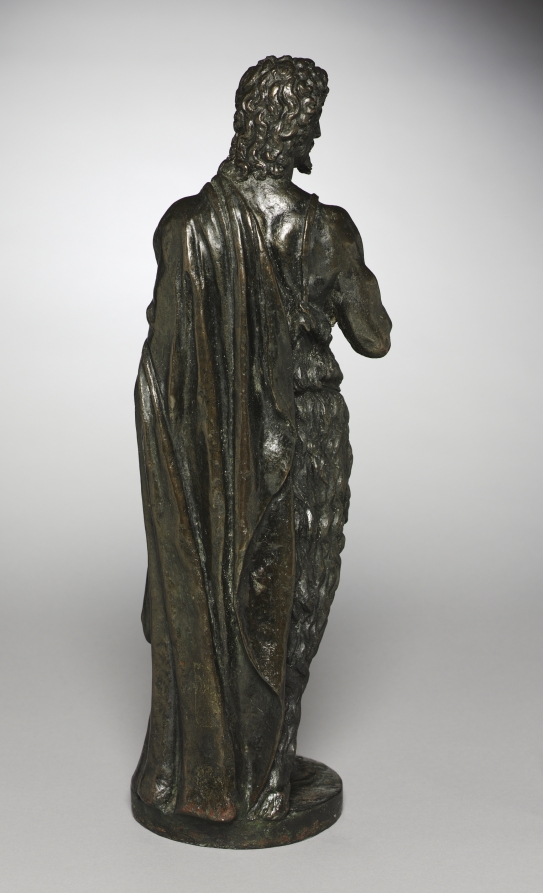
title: Saint John the Baptist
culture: Italy, Verona, 16th century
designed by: Angelo de Rossi (Italian)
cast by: Giuseppe de Levis (Italian, 1605)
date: late 1500s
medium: bronze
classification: Sculpture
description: Saint John wears the hair shirt he fashioned during his retreat into the wilderness to live humbly. He clenches a device of baptism, a shell to pour the water.